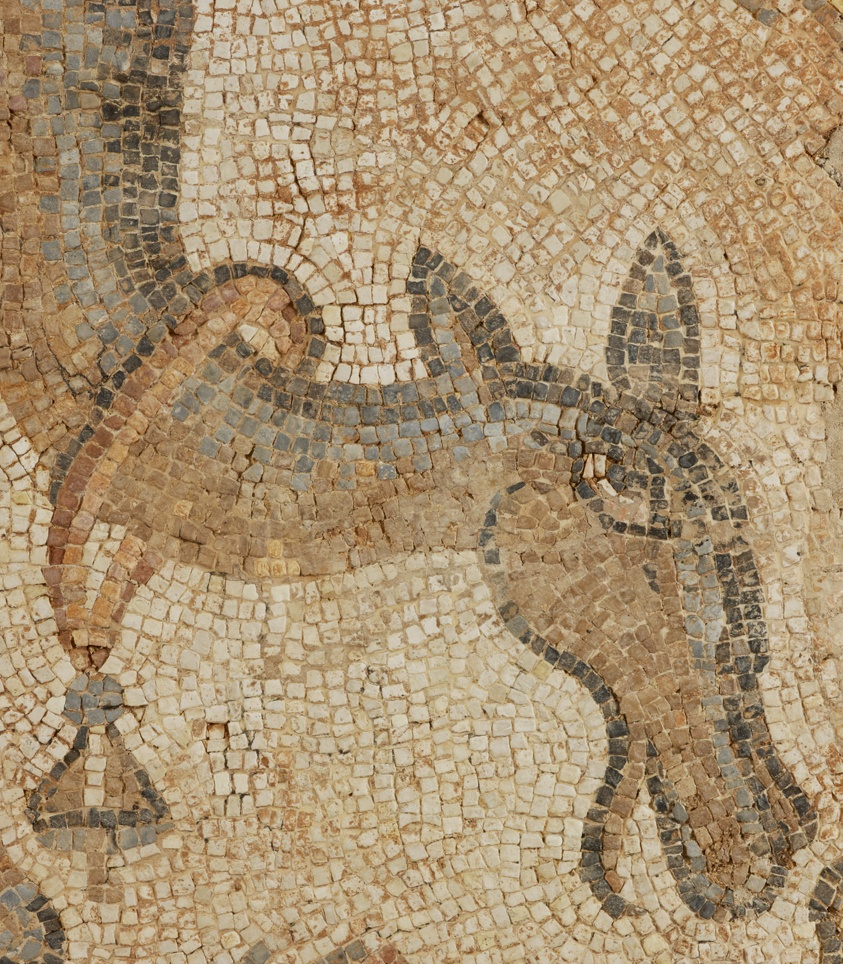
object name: Architectural fragment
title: Mosaic Fragment with Grazing Camel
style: byzantine, ancient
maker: Byzantine; Eastern Mediterranean, probably Syria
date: 5th century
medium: Stone in mortar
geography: Byzantine Empire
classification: architectural fragment; mosaic; ancient art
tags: animals